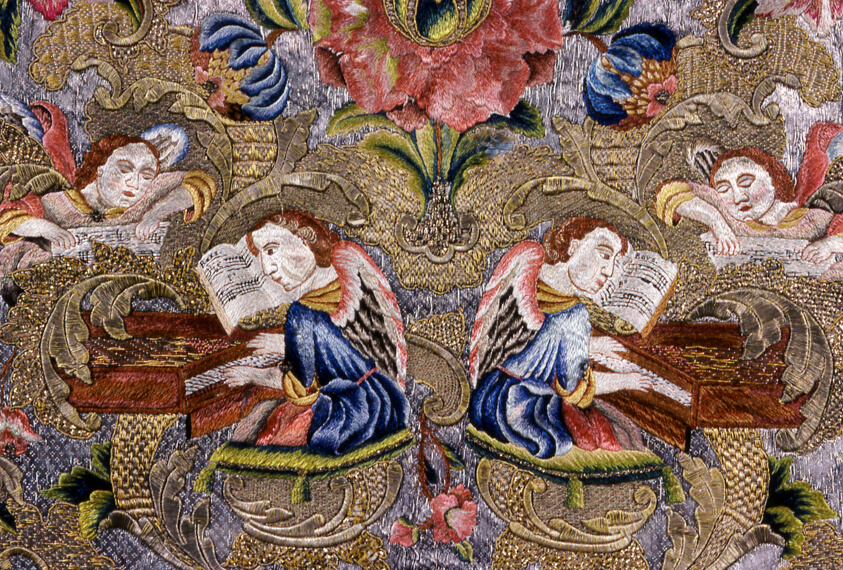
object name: Textile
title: Dalmatic and Humeral Veil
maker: Bavaria, Austria, Spain, or Mexico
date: 1675/1725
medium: Silk, plain weave; underlaid with linen, plain weave; embroidered with silk, gilt-metal strips and purl, and gilt- and silvered-metal-strip-wrapped silk in back, satin, split, and stem stitches; laid work, couching, padded couching, and French knots; gilt-metal spangles; edged with appliquéd linen, plain weave; embroidered with gilt-metal strips and gilt-metal-strip-wrapped silk in laid work, couching, and padded couching; lined with linen, plain weave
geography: Bavaria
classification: textile; needlework (visual works); liturgical; costume